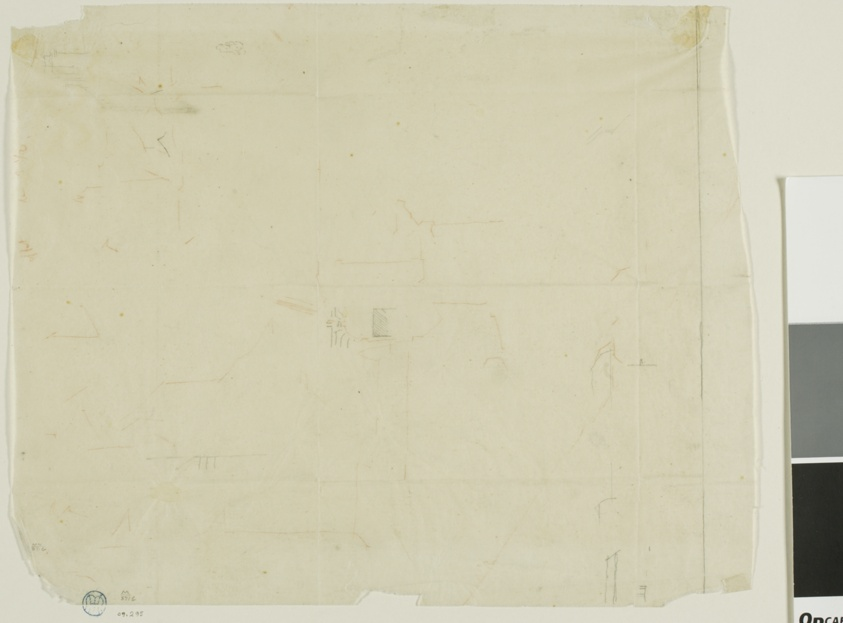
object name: Drawing and Watercolor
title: Diagram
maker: Charles Meryon (French, 1821-1868)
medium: Red Conté crayon with graphite on cream wove tracing paper (discolored to tan), tipped on cream wove card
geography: France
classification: graphite; drawings (visual works); prints and drawing